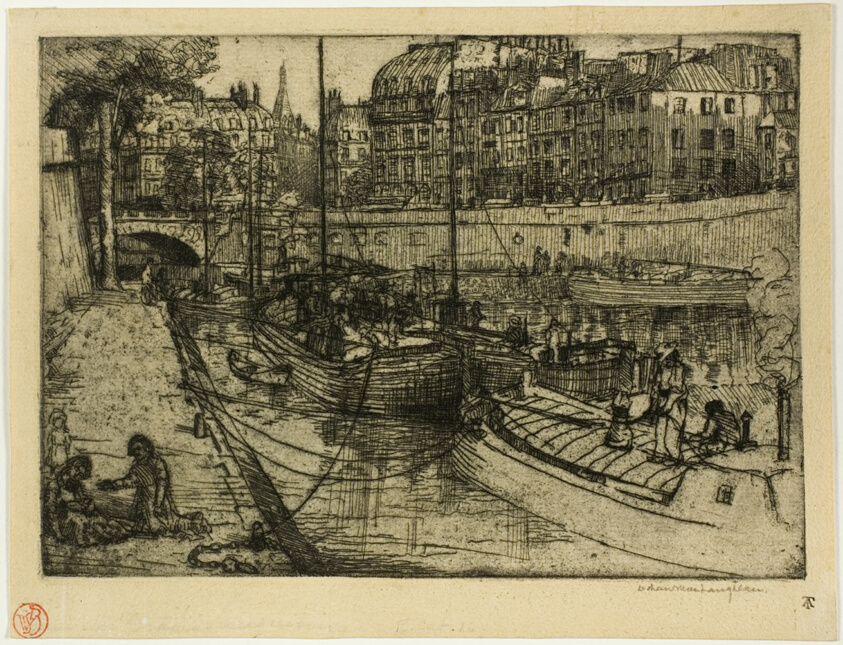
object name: Print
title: Quai des Grands Augustins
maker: Donald Shaw MacLaughlan (American, born Canada, 1876-1938)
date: 1900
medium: Etching in black on cream laid paper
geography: United States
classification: etching; print; prints and drawing